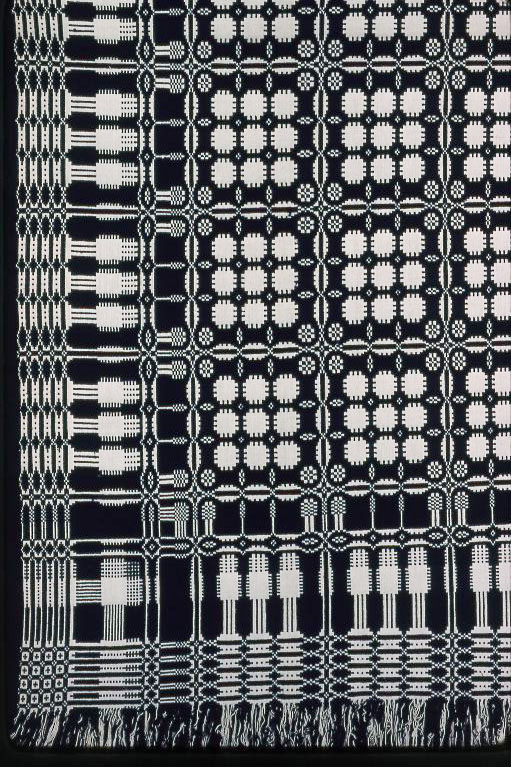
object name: Textile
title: Coverlet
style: 19th century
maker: United States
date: 1825/35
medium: Cotton and wool, plain weave double cloth; woven on loom with Jacquard attachment; two loom widths joined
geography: United States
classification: weaving - coverlet; coverlet; textile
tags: geometric motif, pine trees, geometric, coverlet